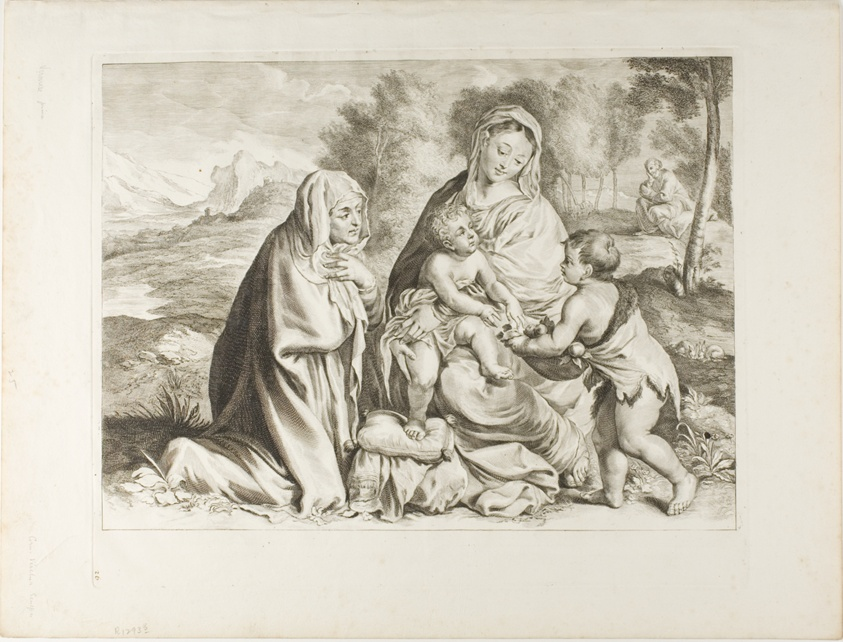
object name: Print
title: The Holy Family with Saint John the Baptist and Saint Elizabeth, from Cabinet Reynst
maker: Cornelis Visscher (Dutch, c. 1629-1658); after Titian (Italian, c. 1488-1576)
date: c. 1655-1658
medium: Etching and engraving on paper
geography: Holland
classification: engraving; print; prints and drawing